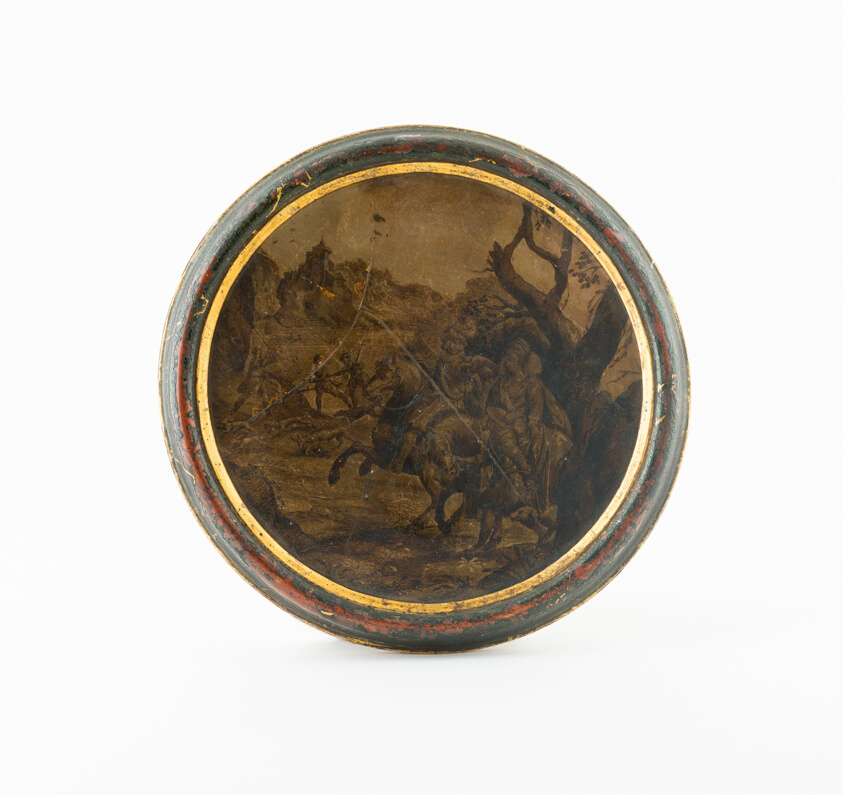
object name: Glass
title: Roundel with Hunting Scene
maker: Germany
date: Late 16th to 17th century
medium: Glass, painted and gilded; gilded wood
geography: Germany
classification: glass; european decorative arts; decorative arts